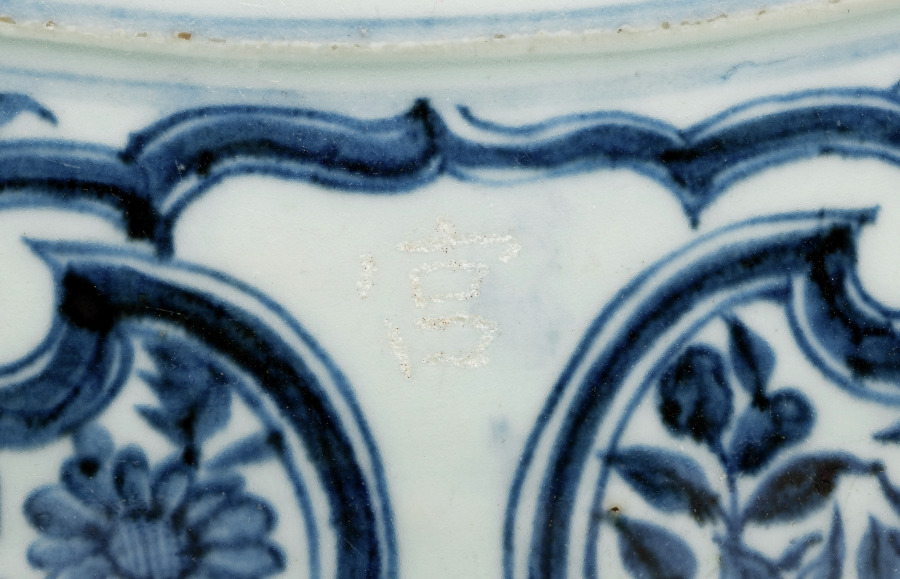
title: Jar with Lion-Head Handles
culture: China, Jiangxi Province, Jingdezhen, Yuan dynasty (1271–1368)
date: 1300s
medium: porcelain with underglaze painted decoration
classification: Ceramic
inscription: 南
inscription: 宮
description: Appreciated for its strong profile, brilliant blue color, and firm delineation of the decorative patterns, this jar is a classic example of Yuan dynasty blue-and-white ware. This type of ware was produced no later than the 1330s for both domestic use (the court and common people alike) and overseas trade. This example testifies to the transmission of artistic ideas and techniques between China and the rest of the great Mongol Empire as a result of trade. The cobalt that was used for the blue underglaze decoration was imported from Iran, likely from Kashan. The band of cloud-collar motifs with phoenixes set against floral grounds, as shown here, is an artistic vocabulary that can also be found in Iranian decorative arts of the Ilkhanid period (1256–1353).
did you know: The characters for "palace" and "south" are scratched into the white glaze on the vessel's shoulder, suggesting that it was once kept in a specific location in a palace.